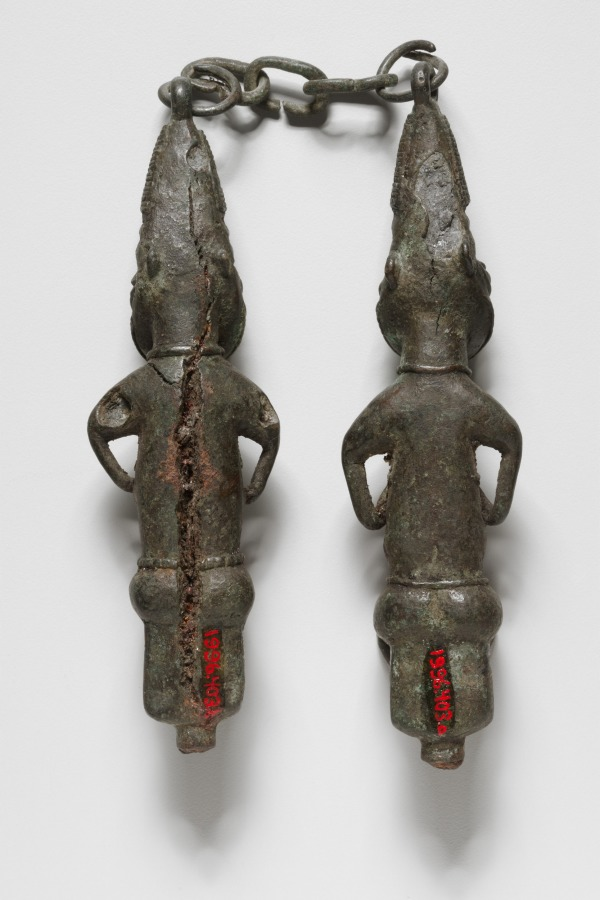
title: Pair of Ritual Staffs (ẹdan Ògbóni)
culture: Africa, West Africa, Nigeria, Yorùbá-style maker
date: possibly 1800s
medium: Copper alloy and iron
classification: Sculpture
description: The chain connecting these two figures allows them to be worn in public by a member of the Ògbóni or Òṣùgbó association as authority emblems. The male on the right gives the association’s typical salute by clasping his left fist on the right one, while the female on the left holds her breasts as a sign of welcome and generosity. The use of copper alloy and iron expresses Ògbóni/Òṣùgbó's concerns with longevity and durability.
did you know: Imagine how this would look when its owner wore it; the chain would go around the back of the neck and the figures would rest on their chest.